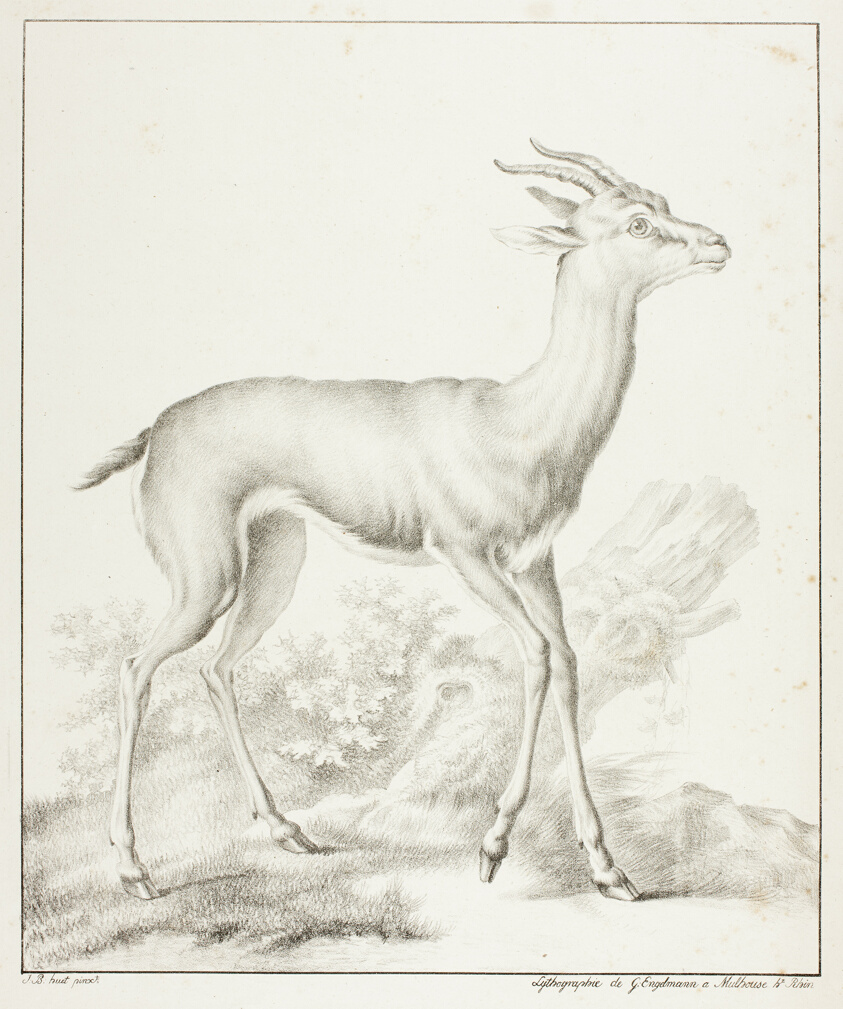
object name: Print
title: Antelope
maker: Gottfried Engelmann (French, 1788-1839); after Jean Baptiste Huet (French, 1745-1811); or after Jean-Baptist Huet, the younger (French, 1772-19th century)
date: 1814/15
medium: Lithograph in black on ivory wove paper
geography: France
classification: lithograph; print; prints and drawing